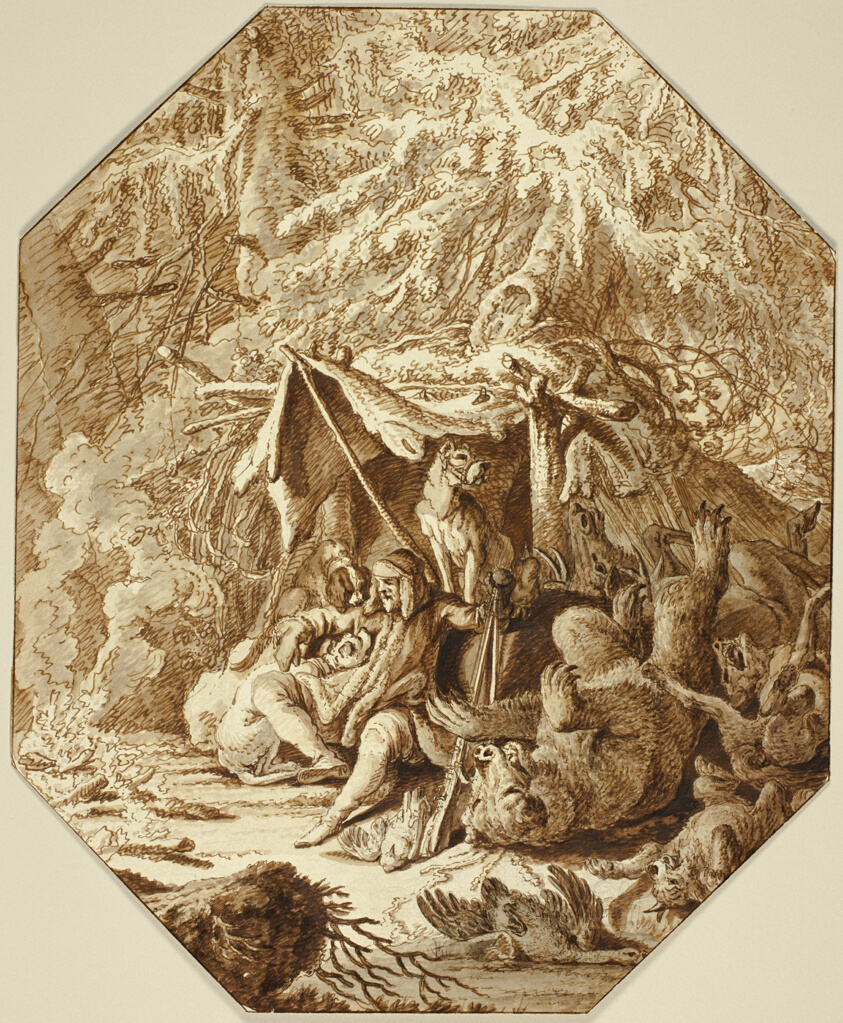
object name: Drawing and Watercolor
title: The Daring Hunter, Enduring in Winter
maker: Johann Elias Ridinger (German, 1698-1767)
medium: Pen and brown ink, with brush and brown and gray wash, over graphite, on ivory laid paper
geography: Germany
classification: pen and ink drawings; prints and drawing; paper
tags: dogs, animals